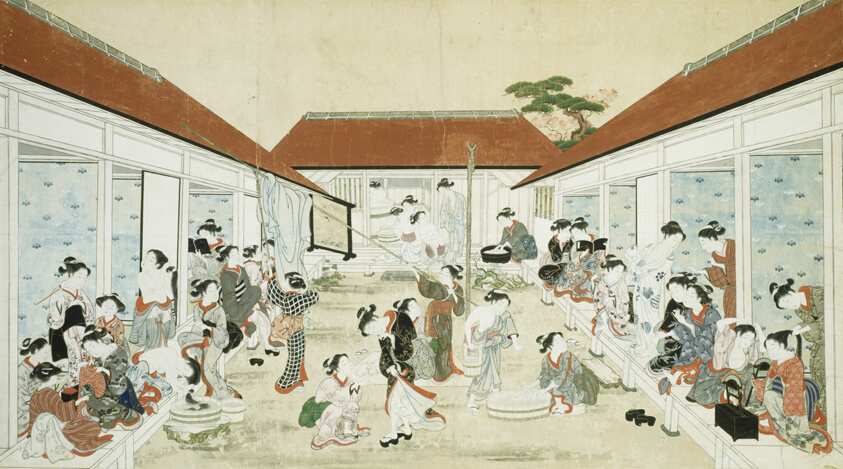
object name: Drawing and Watercolor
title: Women's Bathhouse and Laundry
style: Japanese (culture or style)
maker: Kitao Shigemasa (Japanese, 1739-1830)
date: Mid-18th to early 19th century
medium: Ink and colors on paper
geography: Japan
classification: painting; asian art